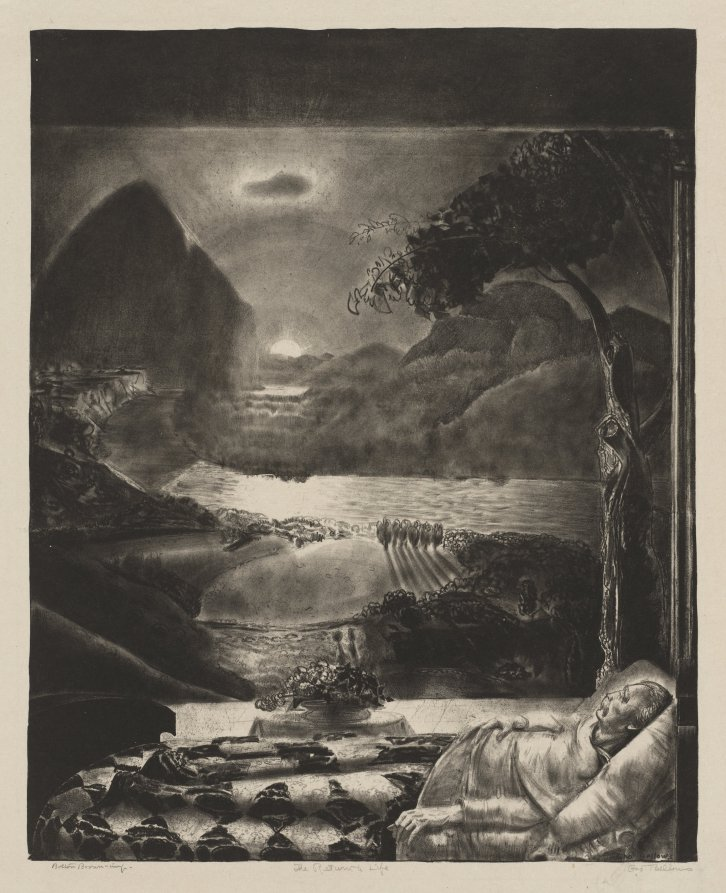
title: The Return to Life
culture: America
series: 11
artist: George Bellows (American, 1882–1925)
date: 1923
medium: lithograph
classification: Print